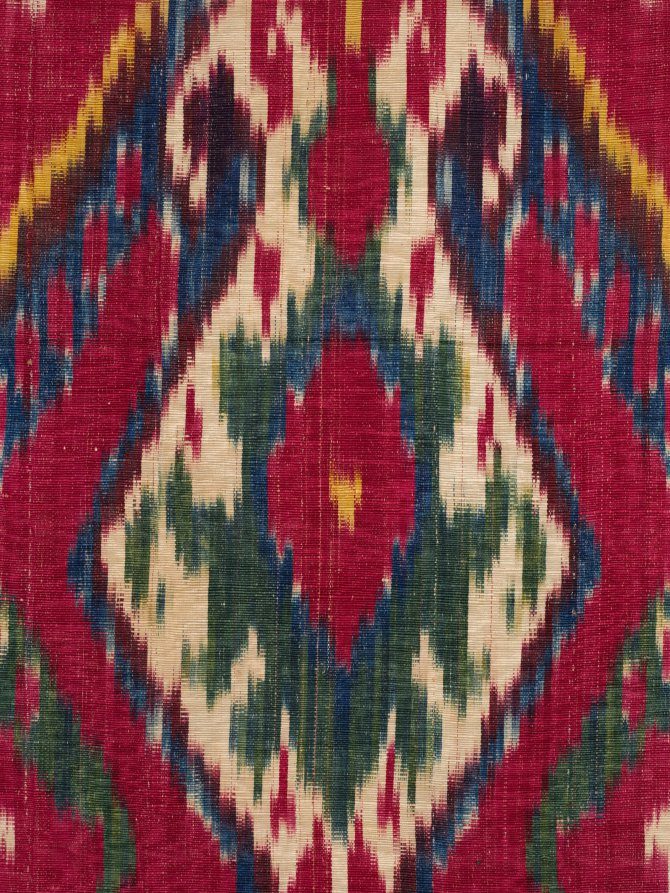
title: Wall Hanging (pardah)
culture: Uzbekistan, Bukhara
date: 1800–1850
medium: Silk: warp-faced plain weave, warp-ikat; cotton weft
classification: Textile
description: Dazzling patterns with saturated colors in the ikat technique provided vibrant wall hangings in reception rooms of the urban elite in Central Asia. In this splendid example composed of five loom widths, the three central lengths display a precise design of amulets complemented by palmettes in the two outer lengths. The irregular contours, telltale indicators of ikat, are masterfully controlled with five rich colors, illustrating the high quality of the earliest known examples in Central Asia from the first half of the 1800s. In the ikat technique, the design was dyed on the warp before it was woven in a resist-dye process. Thread was tightly wrapped around the warp to resist dye penetration for each area of color. This labor-intensive process created hangings and garments cherished for their vibrant colors with "fuzzy" contours.